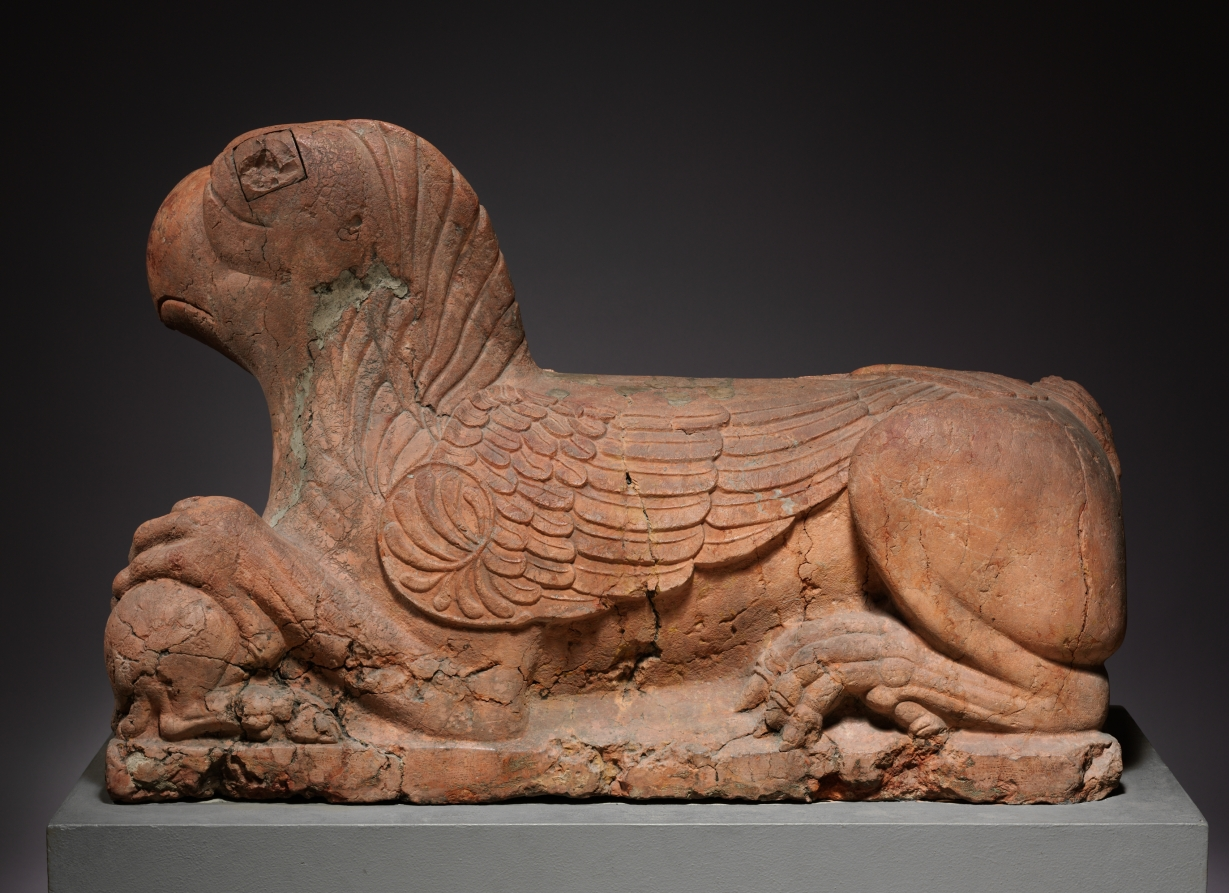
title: Guardian Griffin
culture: Northern Italy, Emilia, 12th century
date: 1150–1175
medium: pink limestone (called "Verona Marble")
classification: Sculpture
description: Griffins are fabled creatures that have the characteristics of an eagle and a lion--combining watchfulness and courage. In Christian art, the dual nature of the griffin was often used to signify that of Christ himself: divine (bird) and human (animal). Griffins were often used as guardian figures in church sculpture and were placed in portals and choir screens. The creatures seen here, with their inward-turning heads, were certainly used for such a purpose. When viewed from the front, one griffin may be seen protecting the figure of a knight between its paws, while the other griffin guards a calf. Their original function was probably to support the columns of a porch in front of a church doorway.